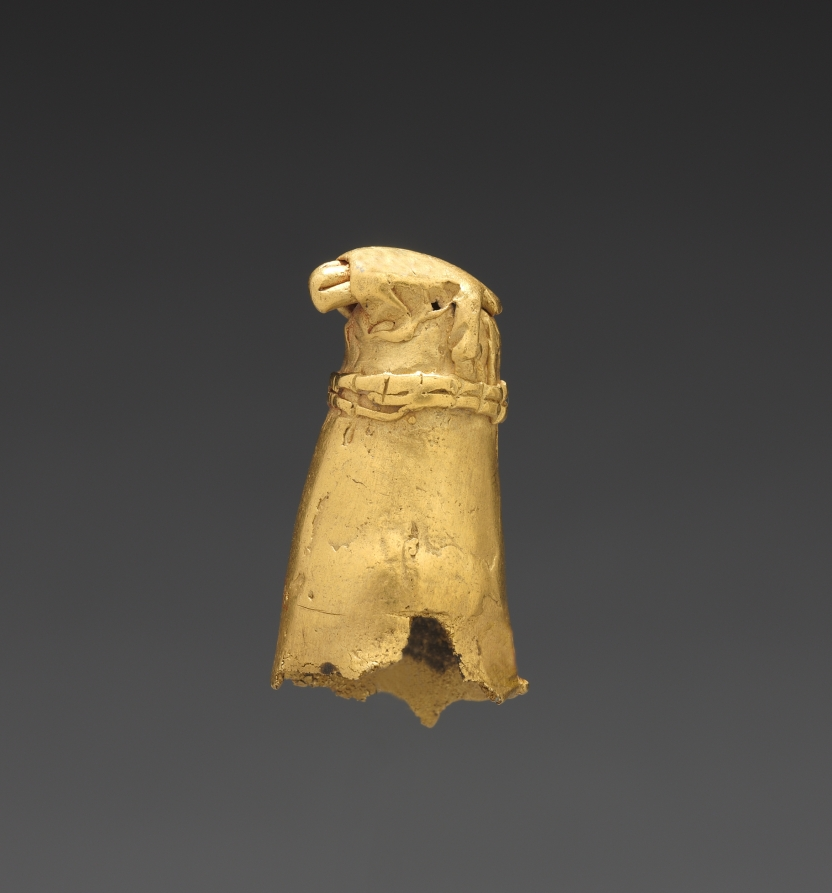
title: Fragment of an Animal Head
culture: Colombia, Quimbaya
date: 1–800 CE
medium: gold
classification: Metalwork